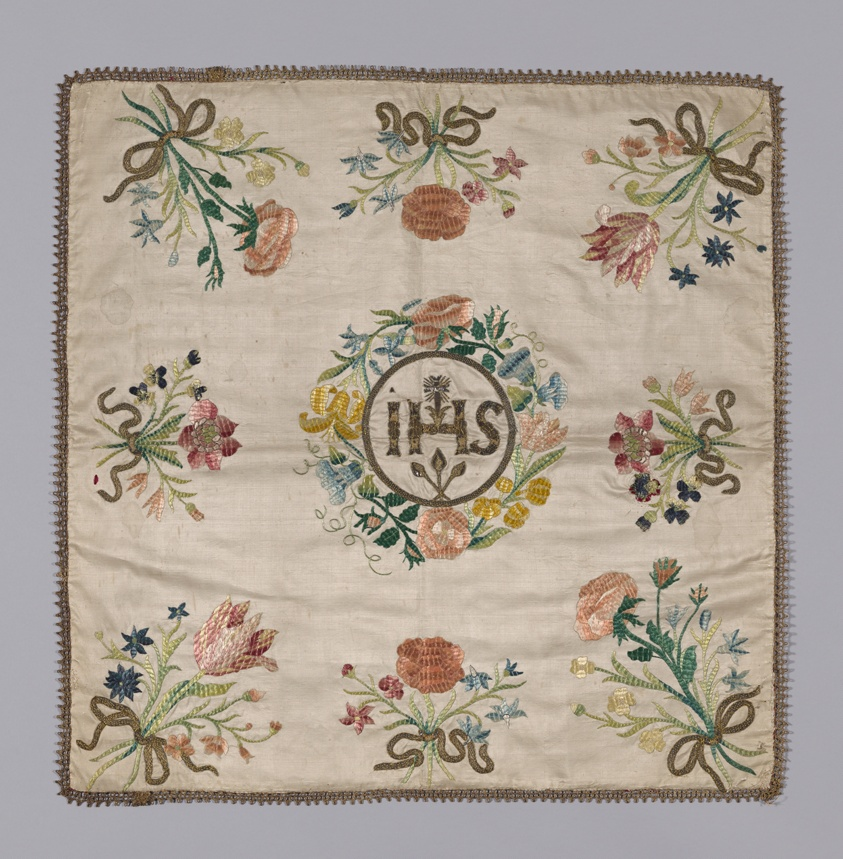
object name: Textile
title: Chalice Cover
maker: Spain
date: 19th century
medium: Silk, warp-faced plain weave; embroidered in silk floss, metal strip wrapped on silk core, metal strip; two-ply metal threads twisted; laid work, couched, couching, stem, outline. bobbin made lace in metal thread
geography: Spain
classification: textile; liturgical; needlework (visual works)